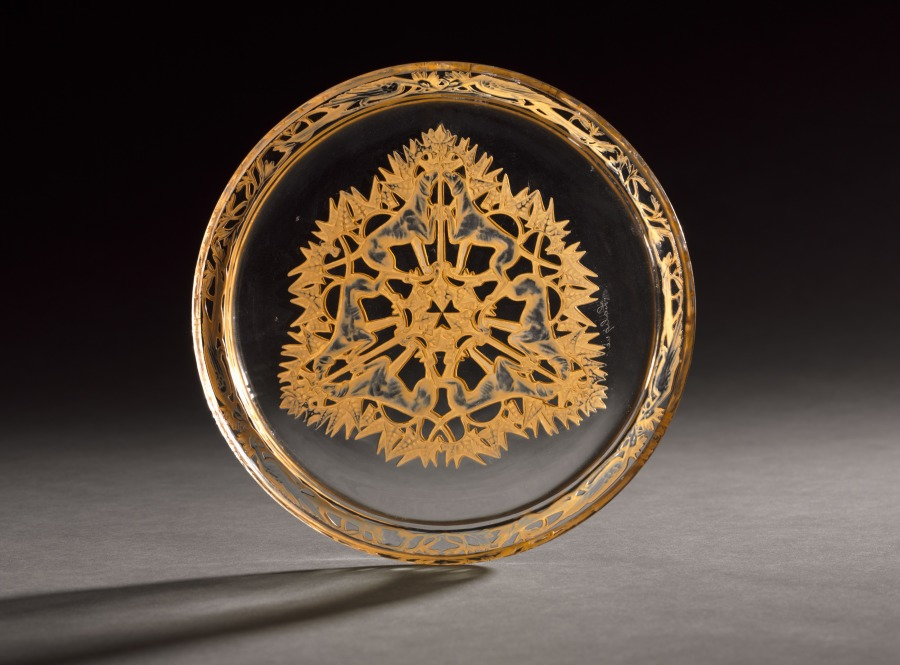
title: Hunting Dogs Plate (Assiette chasse chiens)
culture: France, 20th century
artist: René Lalique (French, 1860–1945)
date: c. 1913–21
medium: glass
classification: Glass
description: Entitled Chasse, Chiens, meaning hunt, dogs, this glass plate's gilded decoration of dogs and birds is intended to evoke the hunt. Six hunting dogs encircle the center of the plate, while game birds trim the perimeter.